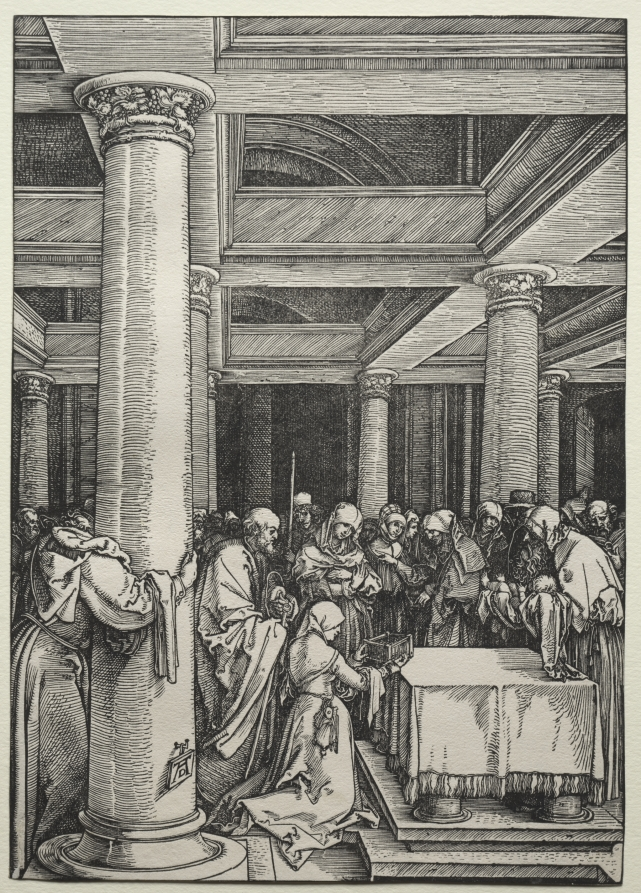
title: The Presentation of Christ in the Temple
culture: Germany, early 16th Century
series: The Life of the Virgin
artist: Albrecht Dürer (German, 1471–1528)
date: c. 1504–1505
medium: woodcut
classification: Print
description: These eight woodcuts (1959.99.8-15) progress from Gabriel’s announcement to Mary that she would bear the Son of God, to the events of her early motherhood and beyond. This included the joy of sharing her pregnancy with her cousin Elizabeth, Jesus’s birth, and the subsequent arrival of the magi. After Jesus’s circumcision and presentation at the temple the Holy Family fled to Egypt to avoid Herod and stayed there for several years. The seemingly out of place last scene shows a glimpse of their daily life in Egypt as Joseph continues his carpentry and Mary spins wool. The Holy Family is surrounded by angels and helpful putti and are blessed by God the Father and the Holy Spirit in the form of a dove overhead.